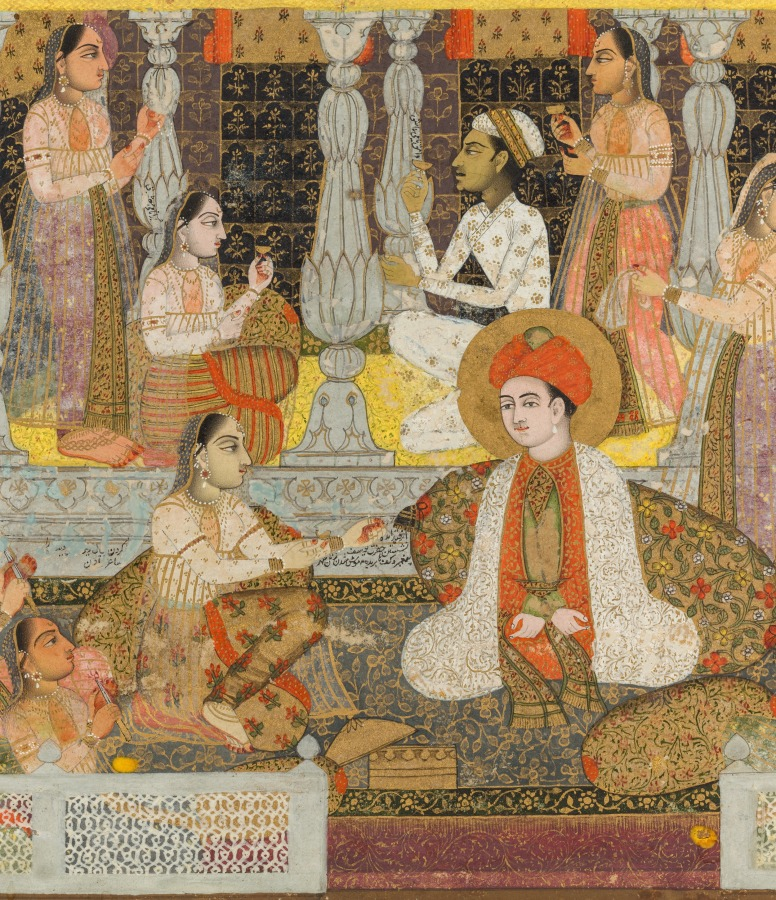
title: Lovers and beloveds: A composite of scenes from Persian, Urdu, and Sanskrit literature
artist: Chitarman II (Indian, c. 1680–с. 1750)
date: c. 1735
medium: Gum tempera and gold on paper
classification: Painting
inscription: Persian inscriptions throughout, in nasta‘liq script: Top left: The celebrated lover Ranjha; Top right, above awning: The notable ladies of the city falling into a swoon having caught sight of Joseph’s beauteous countenance; Top center, on pillar beneath canopy: The celebrated lover Vamiq; On another pillar, behind the woman’s head: The celebrated beloved ‘Azra; Upper left, on pillar: King Nala, the lover; Central figure with halo: The coming from the prison and sitting [in state] of the Lord Joseph the Prophet, with the women of the town cutting the palms of their hands and falling down unconscious; Left of center: [. . . cutting palms . . . wine cups fell from their hands . . . state of wonderment . . .]; Central pavilion at left: Sassi, the beloved the lover [Punnun]; Below central figure of Joseph: The stream of milk Shirin the beloved, weeping The death of Farhad, the lover; Lower right, in front of bearded man: Hafiz of Shiraz; Below his decanter: The stick of candy [referring to the woman with whom, according to popular lore, Hafiz was supposed to have fallen in love as a youth]; Behind the pavilion at right: Bride descending into a grave . . .; On the white railing to the left: Khwaja Bu Ali . . .; Bottom left: Queen Padmavati, the beloved, King Ratnasena, the lover; Bottom right: Majnun, the lover; On page held by Majnun: Say, “He is Allah, who is One, Allah the eternal refuge. He neither begets nor is born, Nor is there to Him any equivalent.” [Qur'an, chapter 112]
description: The figure of Joseph, identified by his halo, sits in the center near the top of this painting of heroes and heroines of ten different Persian, Urdu, and Sanskrit romances. The depicted scene occurs after Joseph has been purchased by Zulaykha in Egypt. Zulaykha, wishing to show him off to her friends and acquaintances, invites them to her home where she supplies oranges and knives. When the women see Joseph, they all are so distracted by his divine beauty that they accidentally cut their hands while peeling their oranges, but remain mesmerized by his appearance. The dramatic scene in the center is from the Persian romance of Khusrau and Shirin, in which Farhad, a stonecutter who loved Shirin, threw himself to his death from a mountaintop after hearing news of Shirin’s death, falsely sent to him from his rival Khusrau. The emaciated Majnun is in the lower right corner. Every vignette has been identified with a tiny Persian inscription.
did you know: Below the bearded poet Hafiz is the woman he loved; her name was Stick of Candy.